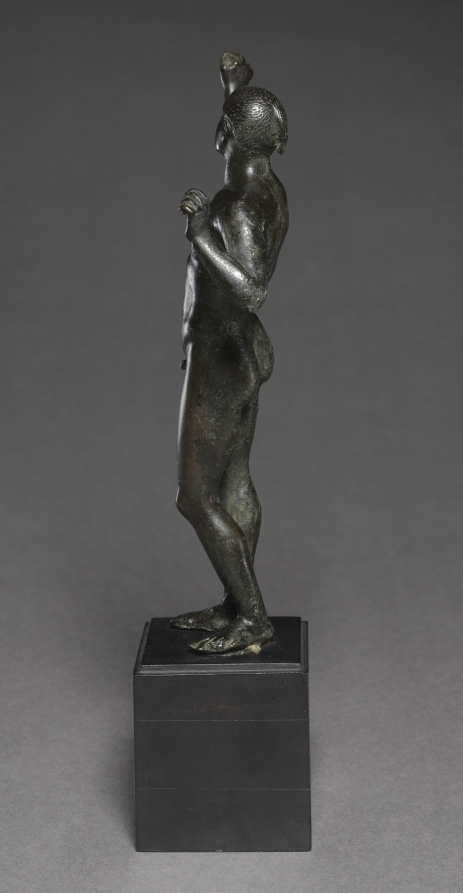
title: Boxer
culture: Greece, Greco-Roman Period, late Ptolemaic Dynasty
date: 100–30 BCE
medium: bronze. solid cast, with copper inlays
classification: Sculpture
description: This boxer raises his arms to pull tight the thongs (now lost) that Greek and Roman boxers wound around their hands for protection. The sinuous body curve and long proportions are characteristic of the late Hellenistic period, when artists created more elongated versions of athletes and other classical figures.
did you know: The long topknot (cirrus) identifies this athlete as a hand-to-hand fighter, most likely a boxer.